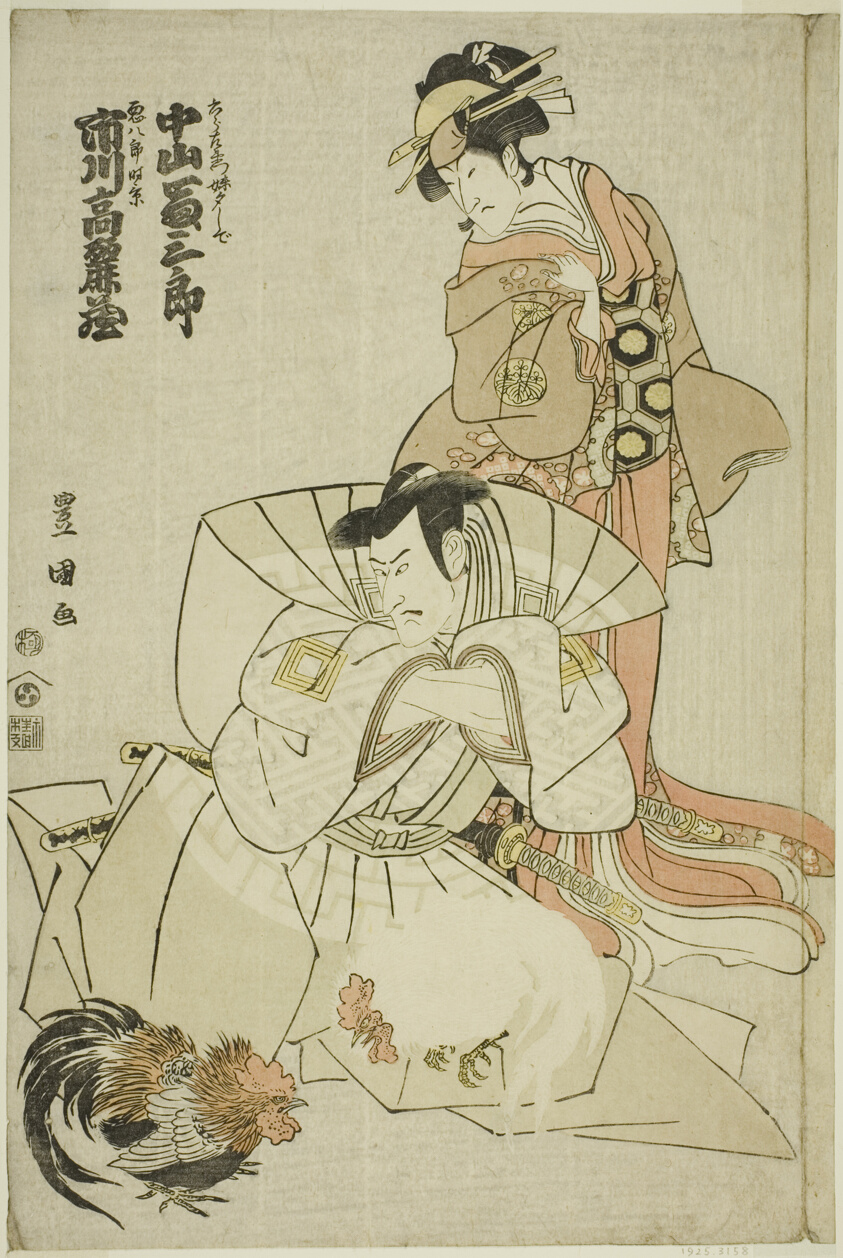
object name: Print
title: The actors Ichikawa Komazo III as Akuhachiro Tokikage and Nakayama Tomisaburo I as Yushide, the sister of Rokurozaemon, in the play "Hana to Mimasu Yoshino no Miyuki," performed at the Nakamura Theater in the eleventh month, 1798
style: Japanese (culture or style)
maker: Utagawa Toyokuni I 初代 歌川 豊国; Japanese, 1769–1825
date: 1798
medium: Color woodblock print; oban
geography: Japan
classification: woodblock print; print; asian art